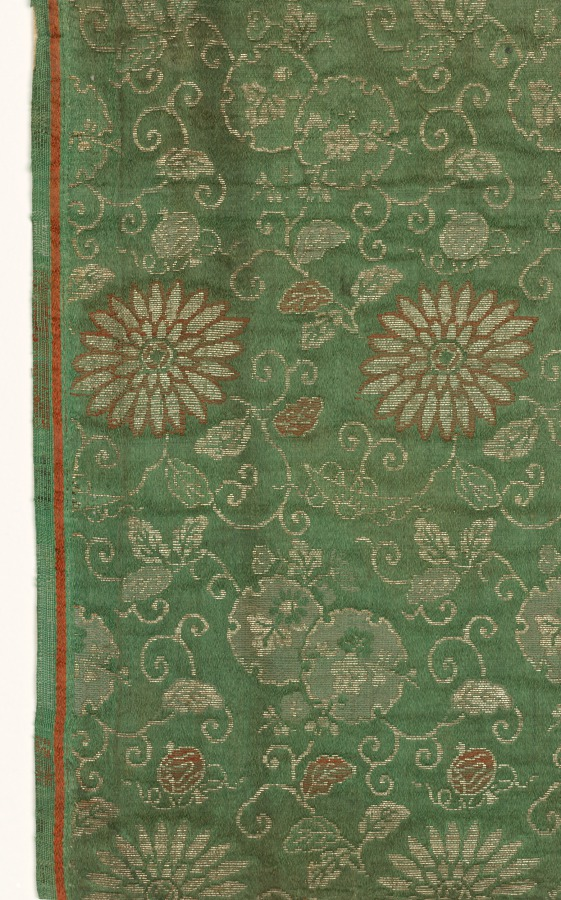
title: Fragment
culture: China, 19th century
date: 1800s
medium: silk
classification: Textile